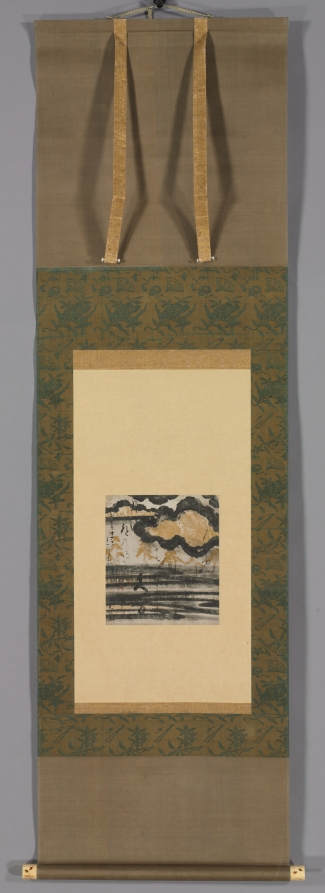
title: Poem-card from the Shinkokin wakashu (New Collection of Japanese Poems from Ancient and Modern Times) with Design of Pine on a Beach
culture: Japan, Momoyama (1573-1615) - Edo (1615-1868) periods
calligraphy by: Hon'ami Kōetsu (Japanese, 1558–1637)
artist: Tawaraya Sōtatsu (Japanese, c. 1570–c. 1640)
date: 1606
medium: card mounted on a hanging scroll; gold, silver, and ink on paper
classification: Painting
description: Tawaraya Sotatsu and Hon’ami Koetsu are both associated with the founding of the Rimpa school of Japanese painting. In this poem-card––one of 16 that survive––Tawaraya painted the gold and silver design, over which Hon’ami recorded poems from Shinkokin wakashu. The verses read from top to bottom and from right to left: "Even as I gaze, the thought of it is lonely. High in the heavens the moon-capital lies still in the sky of its dawning."